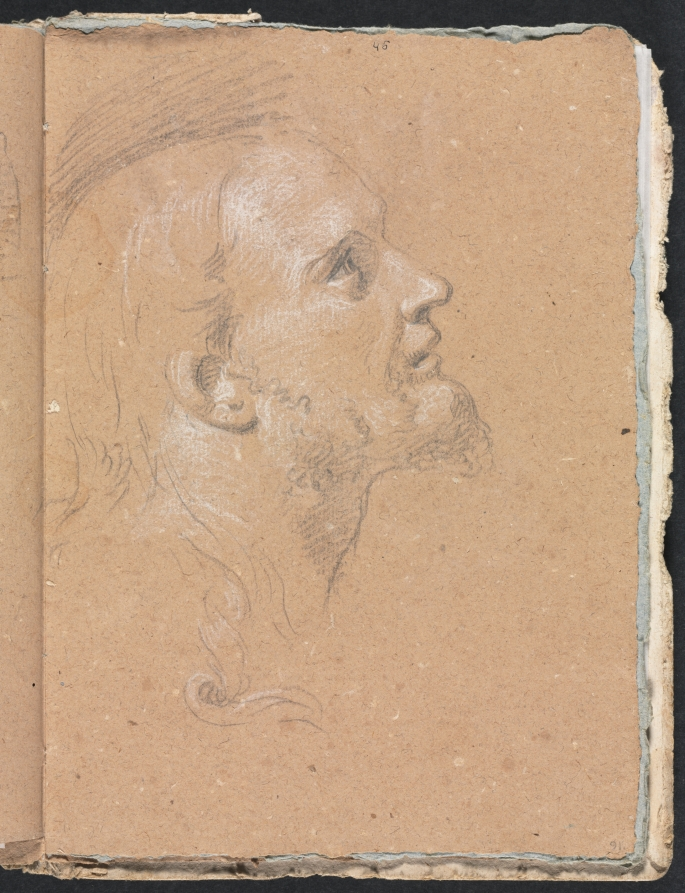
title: Verona Sketchbook: Male head in profile (page 91)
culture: Italy, 18th century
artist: Francesco Lorenzi (Italian, 1723–1787)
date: 1760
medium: black chalk with white heightening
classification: Bound Volume